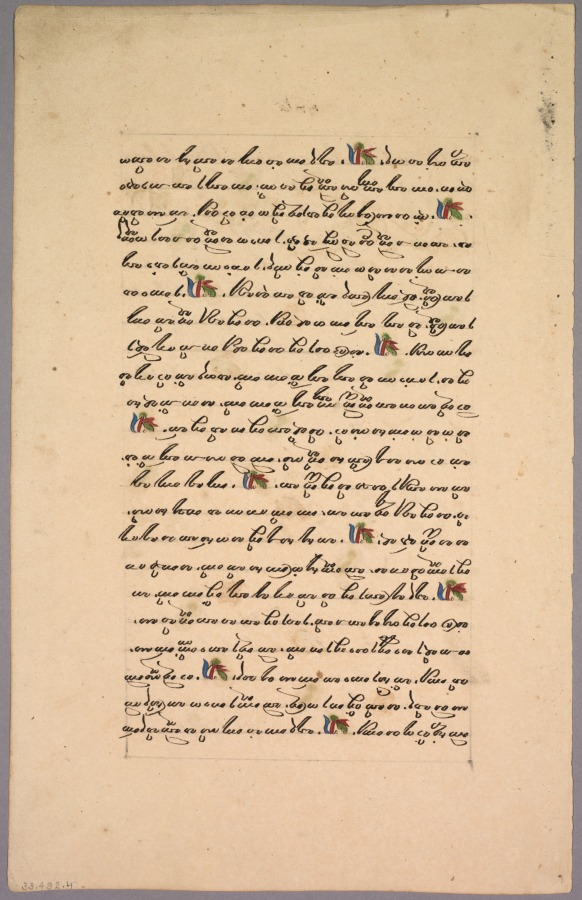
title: Page from Ramayana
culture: Java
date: 1800s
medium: ink on paper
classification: Manuscript